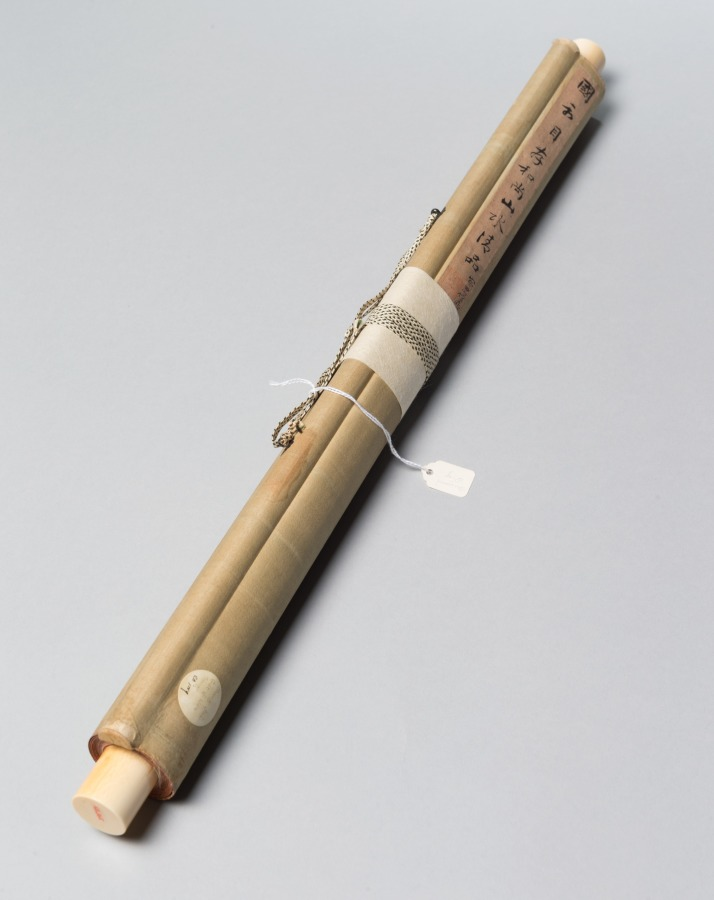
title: The Crossing of the Yangzi River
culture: China, Qing dynasty (1644-1911)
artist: Shang Rui (Chinese, 1634?-)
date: c. 1700–1720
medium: hanging scroll, ink and slight color on paper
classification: Painting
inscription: Colophons: One upper left inscription by the artist followed by two seals; one upper right inscription followed by two seals; three other seals, one in lower left